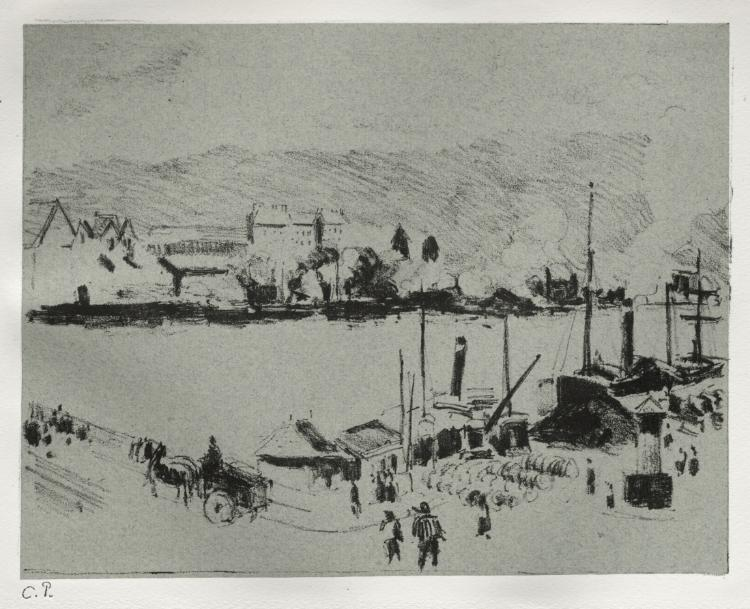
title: Quai Boieldieu in Rouen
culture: France, 19th century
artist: Camille Pissarro (French, 1830–1903)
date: c. 1896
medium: lithograph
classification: Print